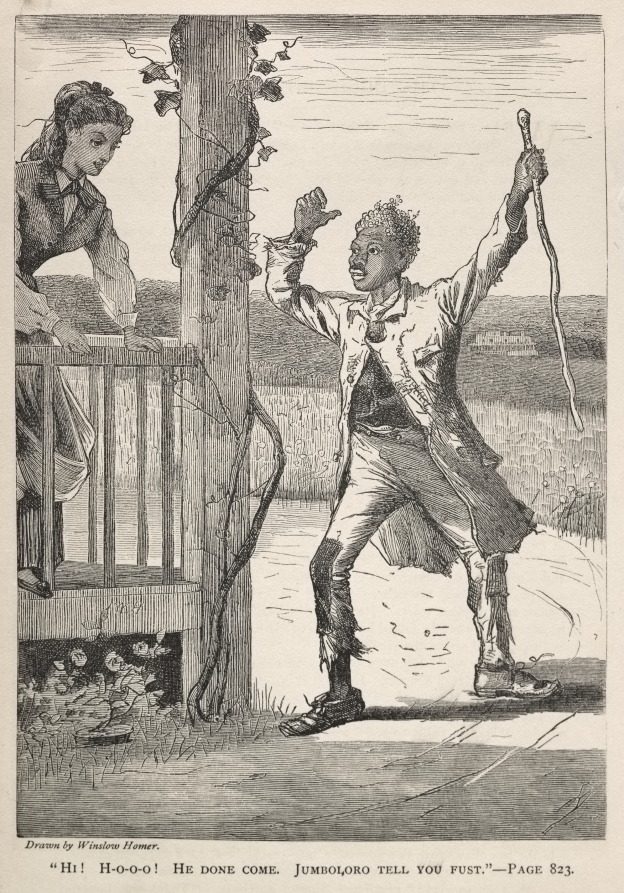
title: "Hi! H-O-O-O! He Done Come. Jumboloro Tell You First."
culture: America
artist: Winslow Homer (American, 1836–1910)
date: 1869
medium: wood engraving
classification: Print